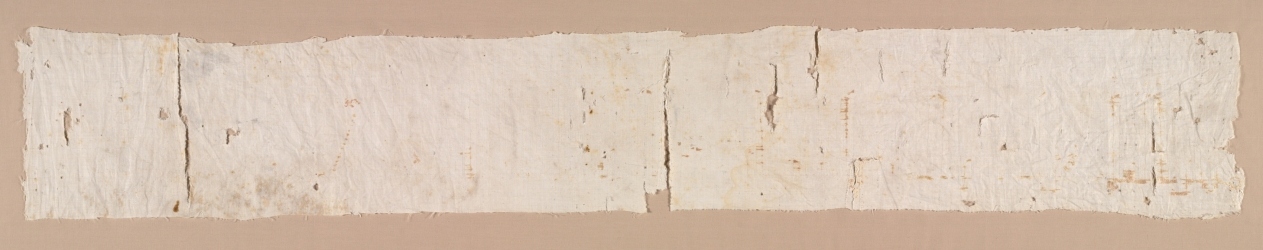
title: Tiraz of Caliph ‘Abd al-Rahman III, from the reliquary of Santa Librada, Cathedral of Seqüenza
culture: Spain, Cordoba, Spanish Umayyad period (756–1031)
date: 941–42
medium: Linen; silk: embroidery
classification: Embroidery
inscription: only the traces of a very large-scale elaborately foliated Kufic inscription preserved, largely in the form of needle holes but with a few small areas where the stitches are intact. This is approximately the second half of the original full inscription, which measured well over two meters long; the bulk of the original textile with the first half of the inscription was formerly preserved in the Cathedral of Siquenza. As preserved on the two fragments, the full inscription reads: "[Commander of the Be]lievers al-Masir li-Din al-Muslimin, may God support him! That which was made through the agency of Durri, his servant, in the year thirty and three hundred."